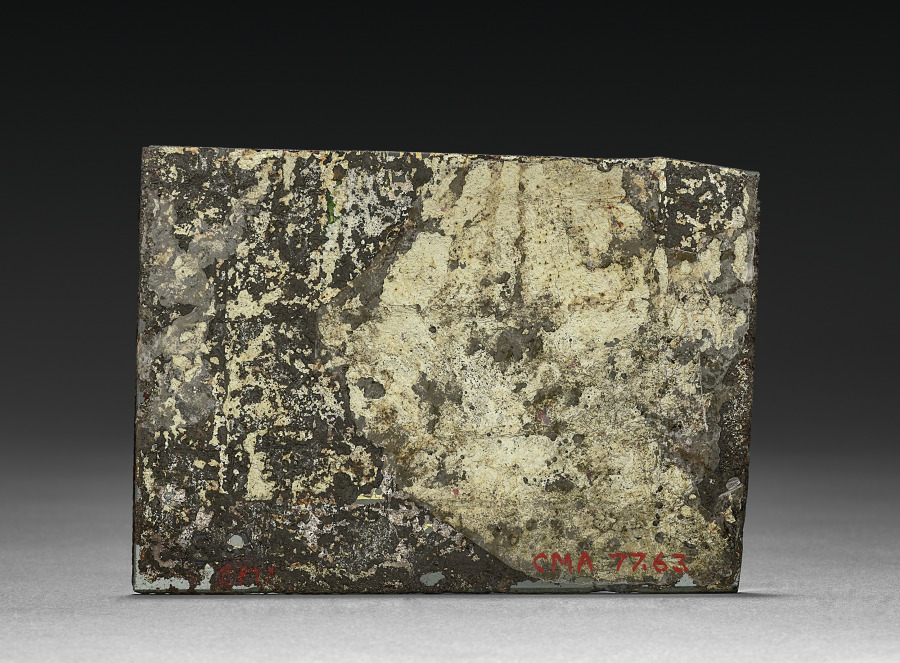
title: Fragment of the Reverse Side of a Mirror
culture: India, probably Jaipur, 18th century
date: 1700s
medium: gilded and enameled glass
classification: Glass